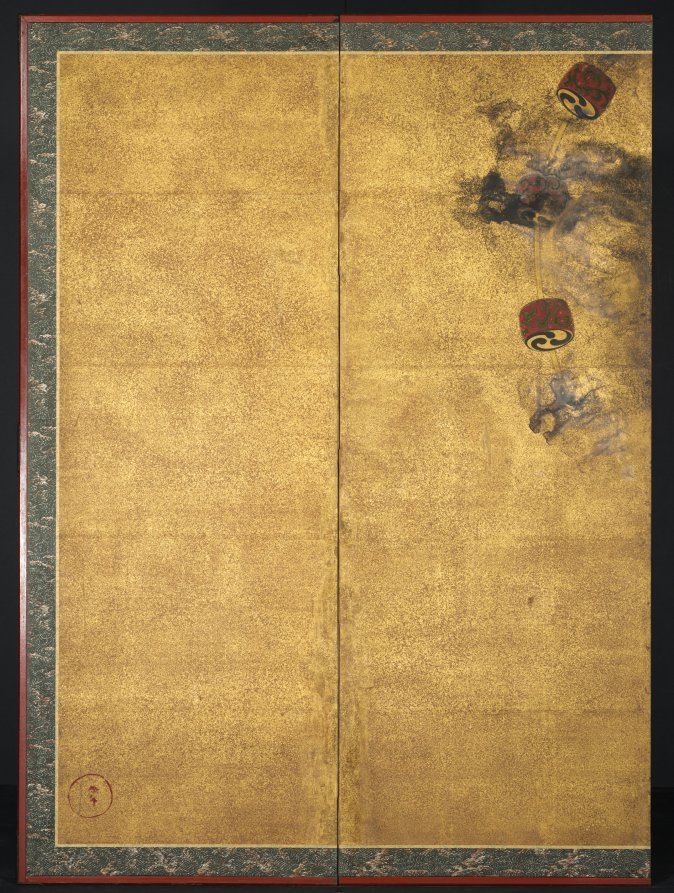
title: God of Thunder (Raijin)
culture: Japan, Edo period (1615–1868)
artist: studio of Tawaraya Sōtatsu (Japanese, c. 1570–c. 1640)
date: mid-1600s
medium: six-panel folding screen; ink, color, and gold on paper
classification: Painting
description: Such depictions of the God of Thunder originated in Buddhist art. Here, the image was painted on paper covered with gold dust, a technique often found in paintings by Tawaraya Sotatsu or of the Sotatsu school. This gold technique and the "Inen" seal here suggest that the anonymous painter of this screen was probably associated with the Sotatsu workshop. The artist used a prototype borrowed from earlier Japanese narrative painting—rather than mechanically reproducing Sotatsu’s image—and created a bold, innovative image that served the world of play and leisure in early Edo Japan. The theme of "God of Thunder" was often paired with "God of Wind" and has been frequently reinterpreted by generations of Rimpa artists. Unfortunately, the screen God of Wind which would have accompanied this God of Thunder cannot be located.